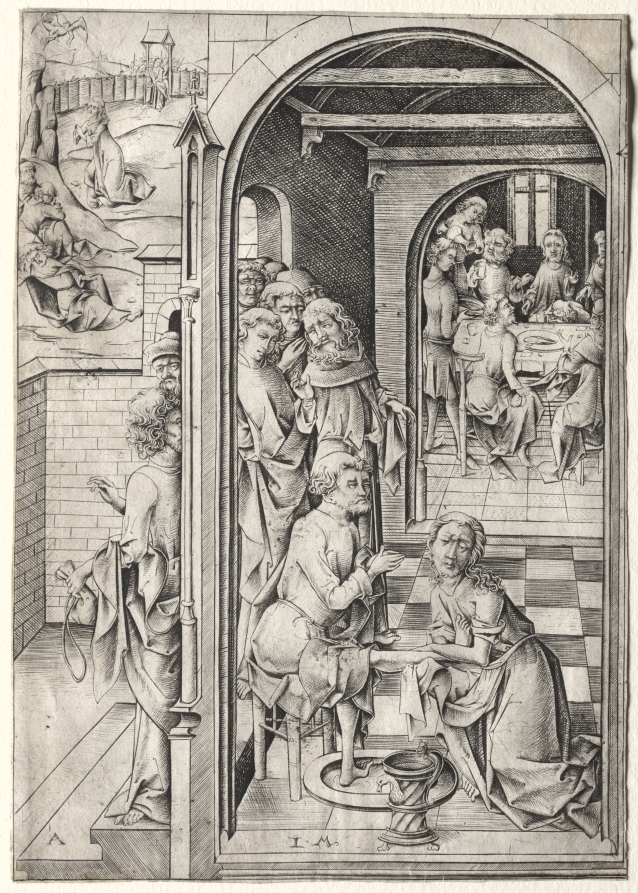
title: The Passion: Christ Washing the Feet of His Disciples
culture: Germany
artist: Israhel van Meckenem (German, c. 1440–1503)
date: c. 1480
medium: engraving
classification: Print